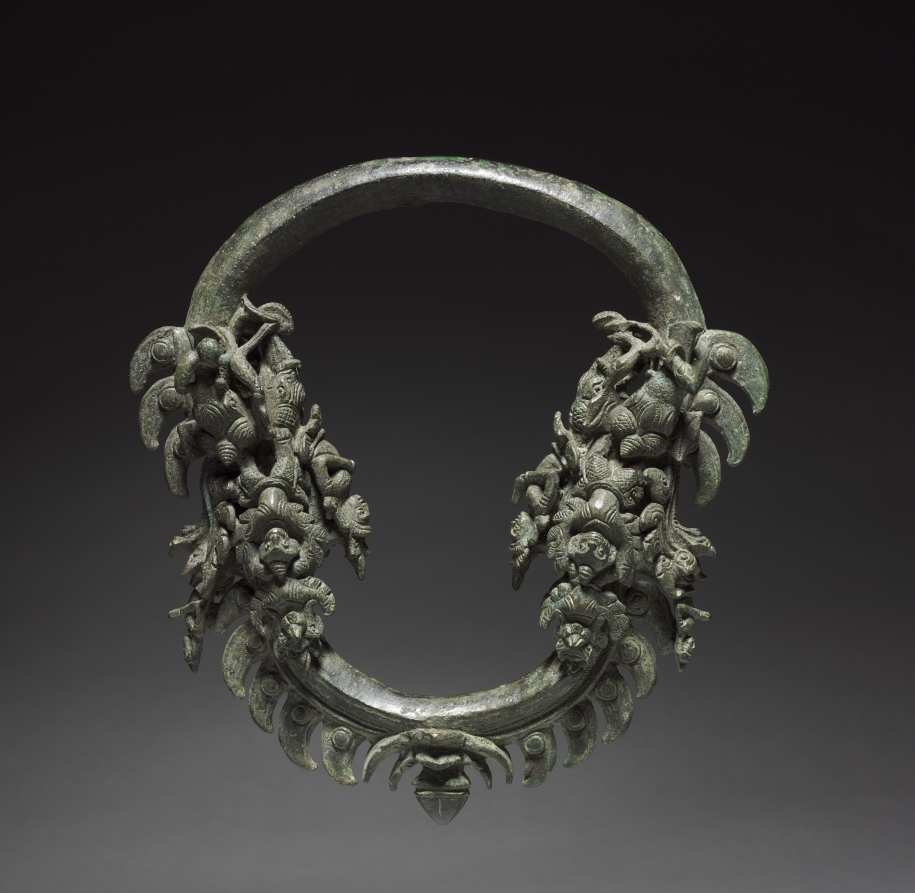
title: Palanquin Ring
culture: Cambodia, probably Angkor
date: 1100s–1200s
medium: bronze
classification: Sculpture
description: When members of the royal family or priesthood traveled in a public festival procession to make offerings at a temple or participate in a ceremony, they would be carried in a palanquin, or a covered litter. Portable objects of veneration, such as bronze images or a sacred fire, were also carried on palanquins. The palanquins had wooden poles, hanging seats or raised platforms, and bronze fittings cast in intricate forms and gilt, lending the palanquins a sumptuous quality. This ring, which supported a suspended seat, would have hung on a hook attached to a wooden pole. The body of the ring is shaped in the form of a pair of nagas, or serpents. The flanges, or protrusions, on the top and sides are stylized spines of the serpent’s body, and the heads rear up on either side. In a richly textured cluster of separately cast figures on both sides of the ring are images of composite bird-human, monkey-human, and elephant forms.